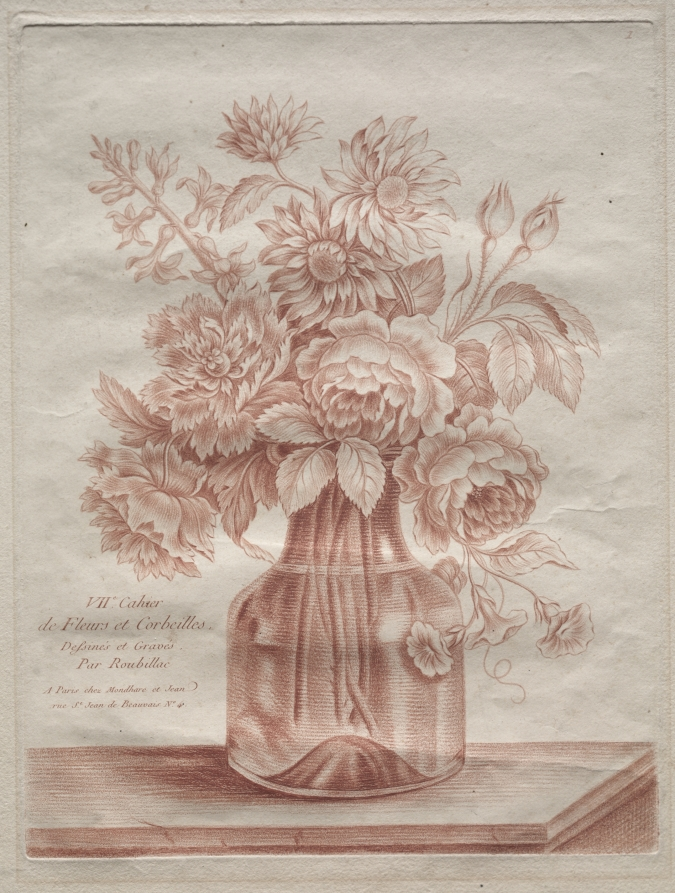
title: Bouquet in a Glass Bottle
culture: France, 18th century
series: Étude de fleurs d'après nature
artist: Roubillac (French, 1739-)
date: c. 1774–1800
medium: crayon manner etching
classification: Print